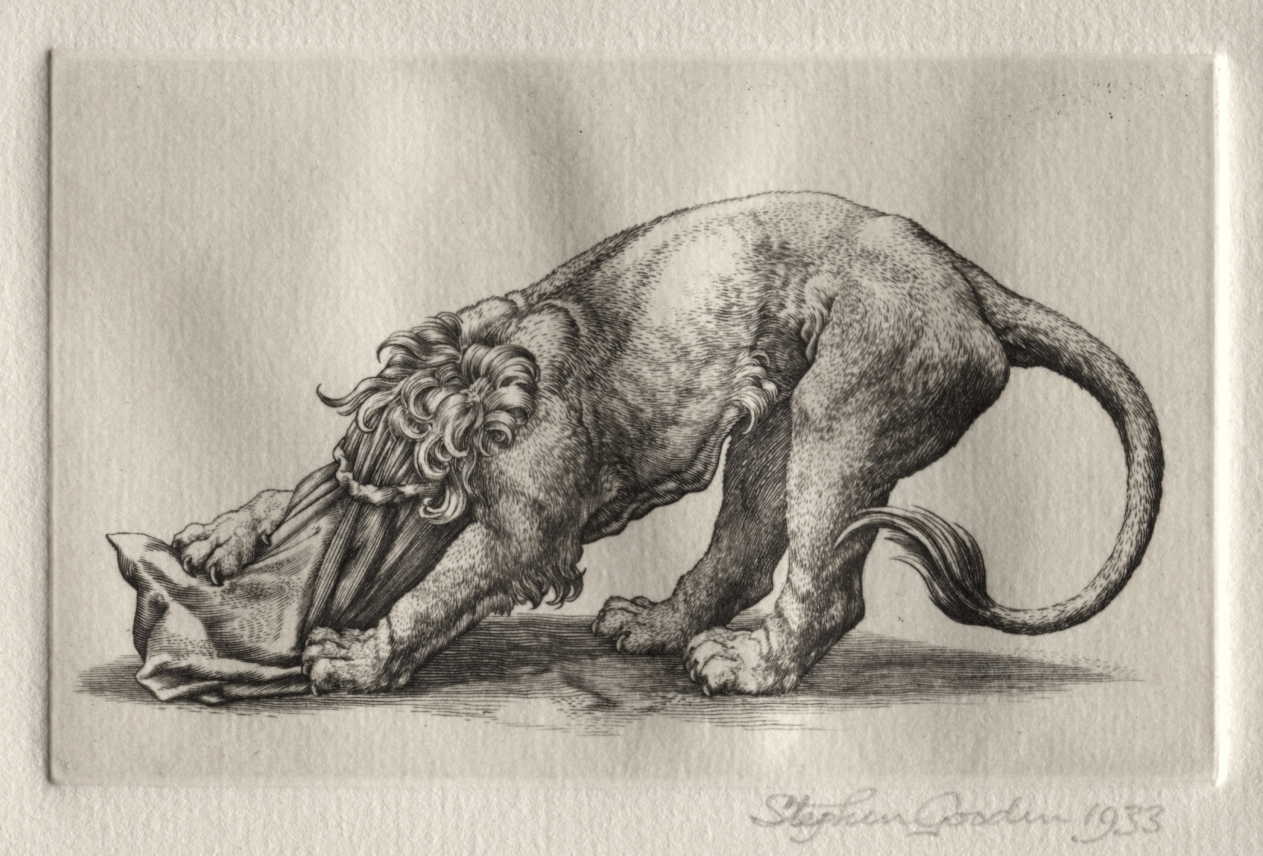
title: Illustration for "Peronnik the Fool": A Lion Tearing at a Sack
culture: England, 20th century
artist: Stephen Gooden (British, 1892–1955)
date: 1933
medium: engraving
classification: Print